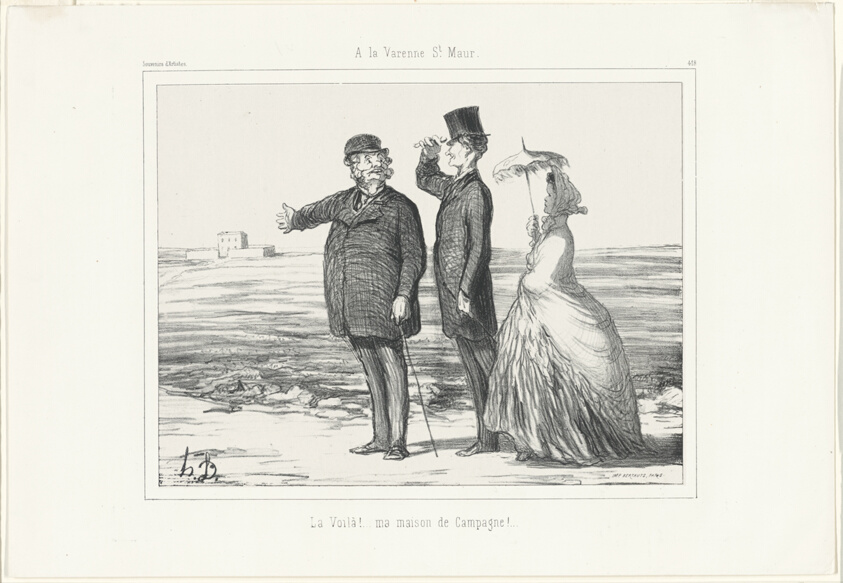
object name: Print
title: At Varenne, Saint-Maur. “There! My country house", plate 418 from Souvenirs d’artistes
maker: Honoré Victorin Daumier; French, 1808-1879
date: 1862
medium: Lithograph in black on ivory China paper, laid down on white wove paper (chine collé)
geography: France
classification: lithograph; print; prints and drawing